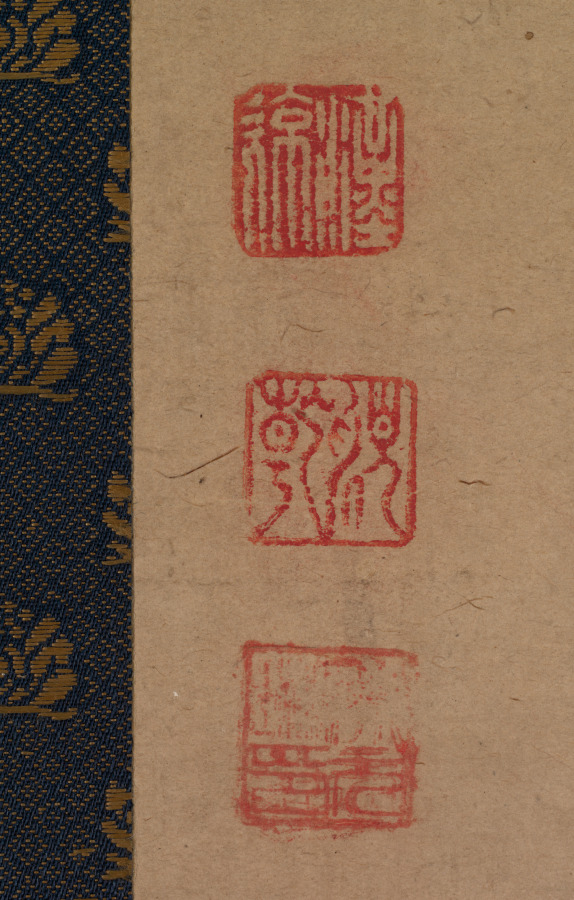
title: Grapevine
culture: China, Qing dynasty (1644–1911)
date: 1700s–1800s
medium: hanging scroll; ink on paper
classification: Painting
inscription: Two-line calligraphic inscription with signature. 5 unidentified seals.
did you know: Clusters of grapes can represent both abundant wealth and numerous offspring.